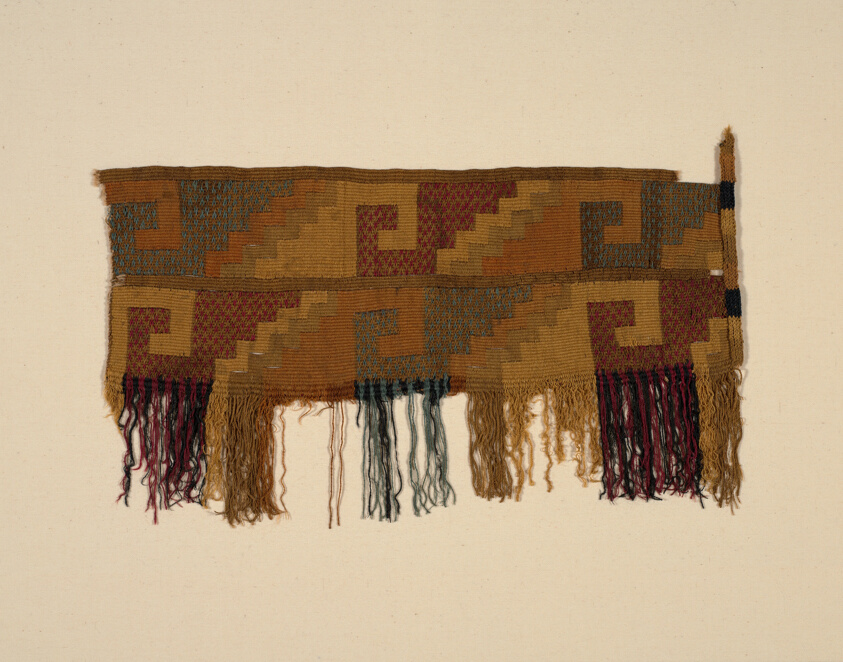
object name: Textile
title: Fragment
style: nazca, early intermediate period, Pre-Columbian, americas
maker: Possibly central or south coast, Peru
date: A.D. 1000/1476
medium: Cotton and wool (camelid), areas of single dovetailed tapestry weave and two-color complementary weft weave; extended ground weft cut fringe; border of cross-knit loop stitches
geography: Peru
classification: textile; weaving